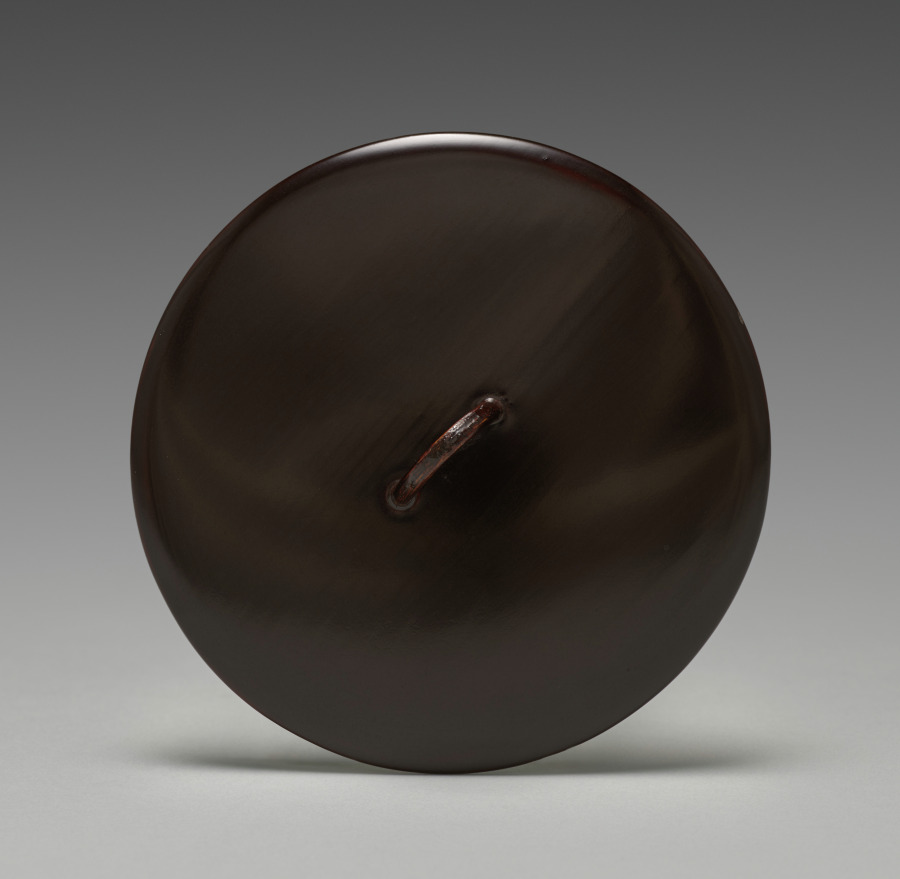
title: Lid for a Water Container with Shell and Seaweed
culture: Japan, Meiji period (1868–1912) or Taishō period (1912–26)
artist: Seifū Yohei IV (Japanese, 1872–1951)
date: 1914–46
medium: lacquered wood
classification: Ceramic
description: Yohei IV chose an aquatic theme for this mizusashi. He applied clay to the surface and molded the shape of a large conch on one side and, on the other, a clam and a scallop. The finer details he incised into the surface of his low-relief shapes. He then painted seaweed as though it were coming out from behind the sea creatures, and he further set off the animals using a masking technique with a gradated blue surround. Finally, he applied a translucent blue glaze, identified on the box as mizusai, over the entire body of the vessel. The resulting effect is that one imagines having descended through the water to the ocean floor.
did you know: A mizusashi, water container, is an essential utensil for a tea ceremony.